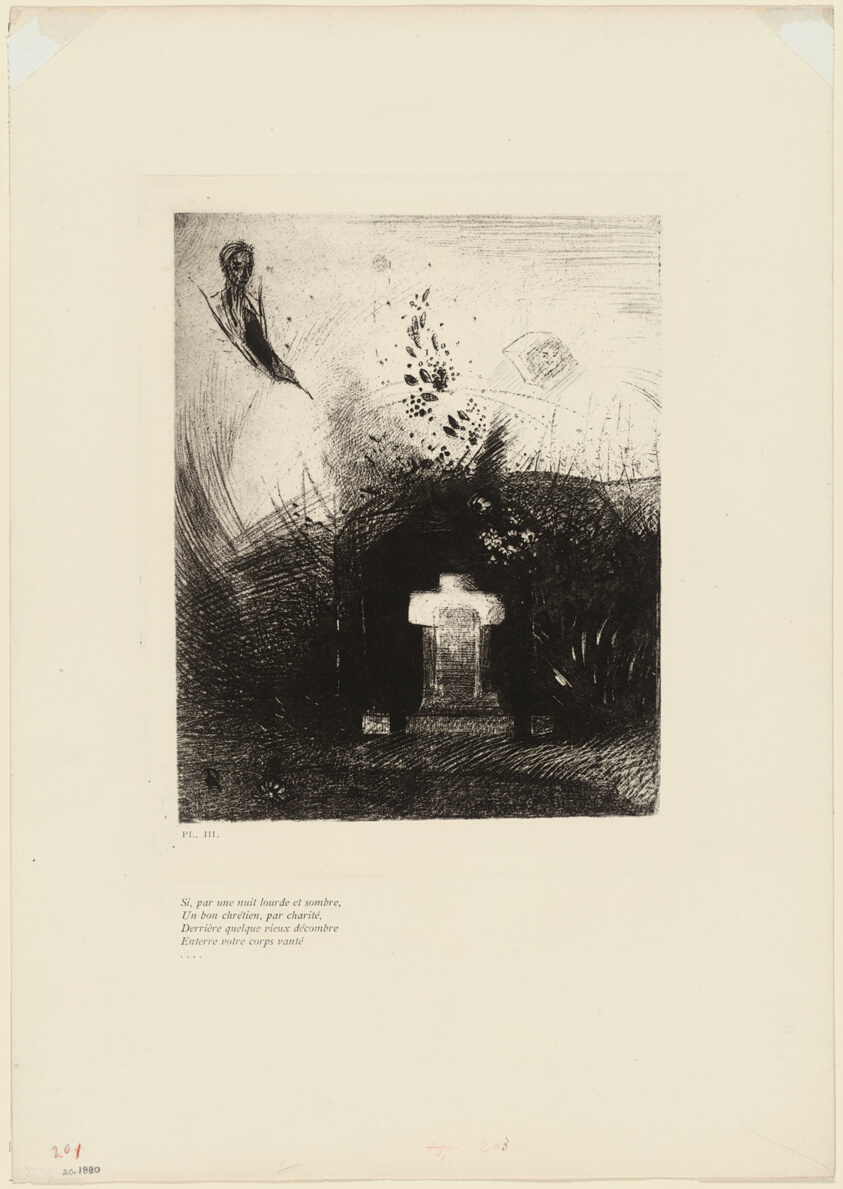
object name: Print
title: If On a Close Dark Night a Good Christian, Out of Charity, Behind Some Old Ruin, Buries Your Arched Body, plate 4 of 9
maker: Odilon Redon (French, 1840-1916)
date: 1890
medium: Photogravure made from an original drawing, in black on ivory wove paper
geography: France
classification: photogravure; reproduction; prints and drawing; print; paper